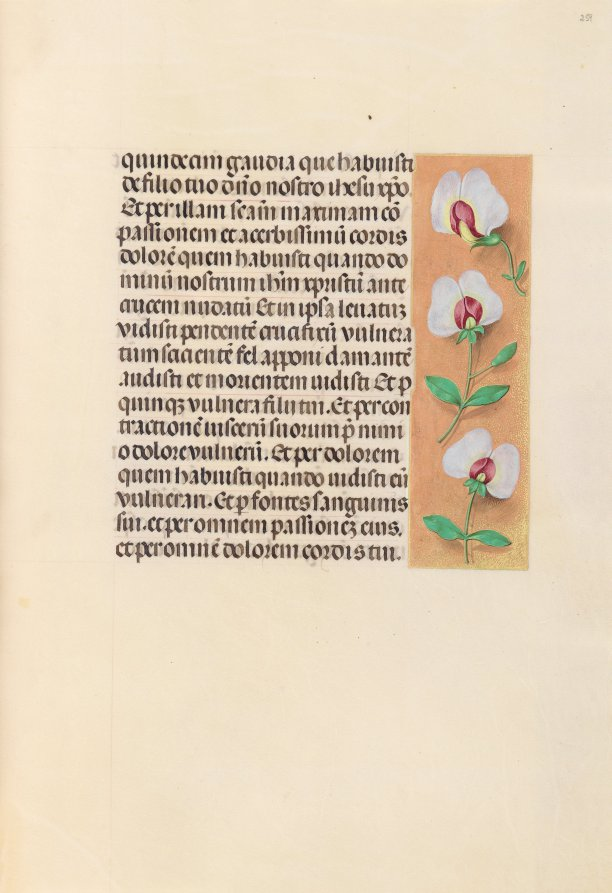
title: Hours of Queen Isabella the Catholic, Queen of Spain: Fol. 259r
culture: Flanders, Ghent and Bruges, late 15th century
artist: Master of the First Prayerbook of Maximillian (Flemish, c. 1444–1519)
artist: and Associates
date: c. 1500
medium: ink, tempera, and gold on vellum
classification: Bound Volume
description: This manuscript was illuminated by a circle of at least five highly organized manuscript painters active in the Flemish cities of Ghent and Bruges. The principal illuminator was Alexander Bening, who painted the majority of the book's miniatures. Manuscripts produced by this circle of artists are renowned for the decoration of their borders, which typically feature a rich variety of realistically-painted flowers, birds, and butterflies. This prayer book, called a book of hours, was intended not for a cleric, but for the private devotions of a lay person-in this case, Isabella the Catholic, Queen of Spain (1451-1504). Isabella's coat of arms embellishes the book's frontispiece. It is unlikely that the book was commissioned by the Queen herself; rather, she probably received it as a diplomatic gift from someone courting her patronage, perhaps Cardinal Francisco Jimenez de Cisneros. A Franciscan friar, Jimenez was dependent upon Isabella for his advancement, first to the post of Queen's confessor in 1492, and then to Archbishop of Toledo in 1495.